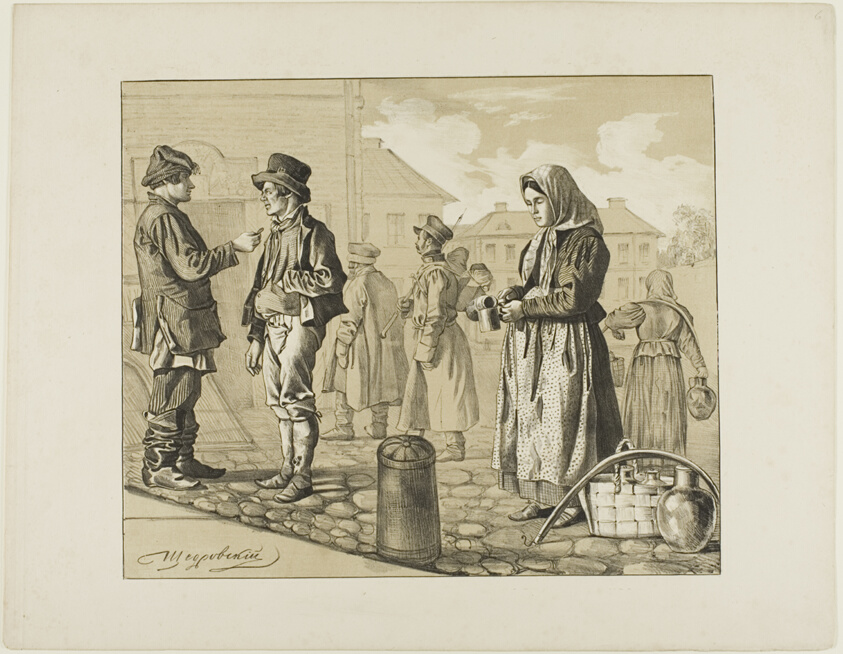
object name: Print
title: Scenes from Russian Folk Life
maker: Ignatii Stepanovich Shchedrovskii (Russian, 1815-1870)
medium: Color lithograph on paper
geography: Russia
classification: lithograph; print; prints and drawing